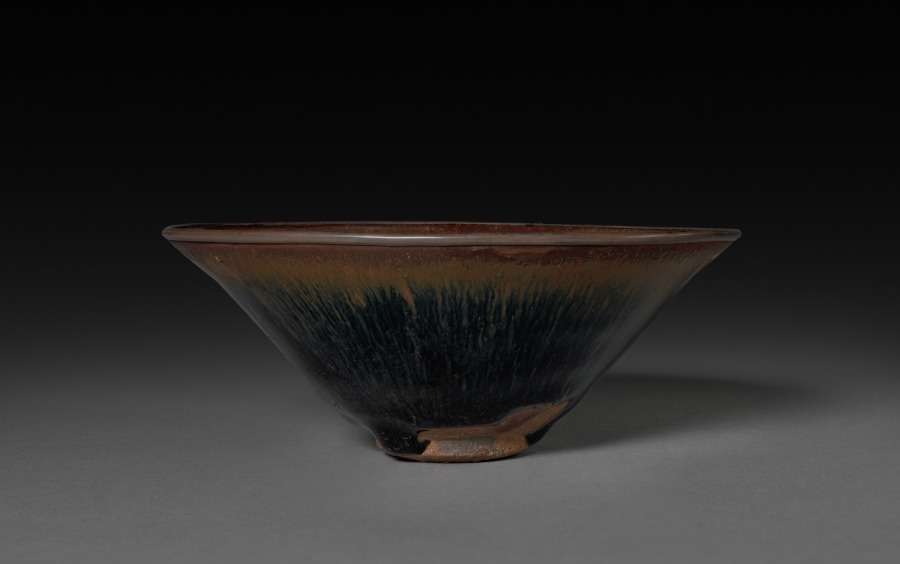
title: Tea Bowl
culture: China, Fujian province, Song dynasty (960-1279)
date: 960– 1279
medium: brown stoneware with iron slip glaze, Jian ware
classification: Ceramic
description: This tea bowl's coarse brown stoneware body was first covered with a thick, blue-black glaze. It was mottled with reddish-brown slip, whose pattern of streaks and spots are affectionately termed "hare's fur" among connoisseurs.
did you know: Jian ware was very popular with the tea cultures in China and Japan.